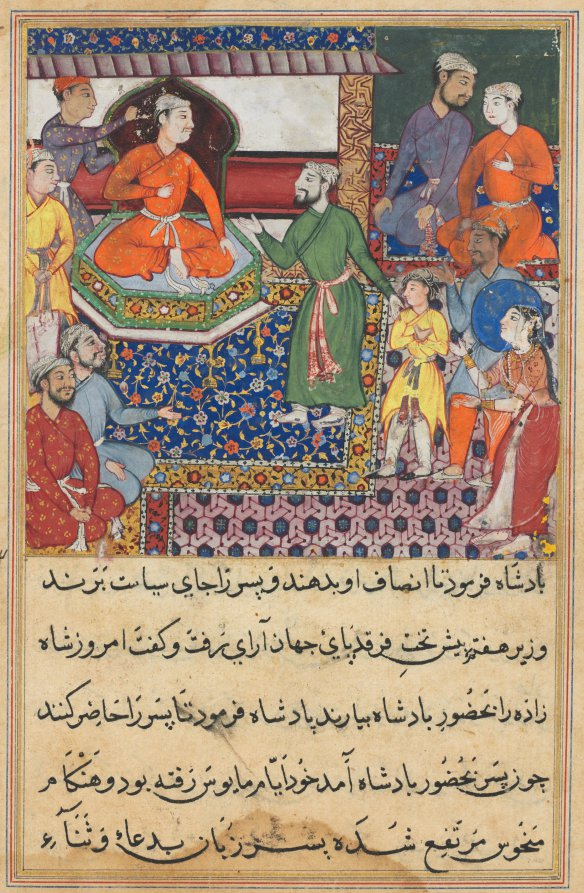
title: The handmaiden again pleads for the death of the prince, from a Tuti-nama (Tales of a Parrot): Eighth Night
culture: Mughal India, court of Akbar (reigned 1556–1605)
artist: Lalu (Indian, active mid-1500s)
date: c. 1560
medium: gum tempera, ink, and gold on paper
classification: Painting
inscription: lā[lū]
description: This early Mughal court scene is the last of the series in which the handmaiden lies about how the prince raped her, and she threatens to burn herself to death if he is not executed. She is depicted in the lower right of the composition. The seventh vizier in the green robe demanded that the prince be brought to the assembly, and he is led in, bound, his turban in disarray.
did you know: The prince’s undone turban, loose hair, and bound wrists indicate his ordeal.